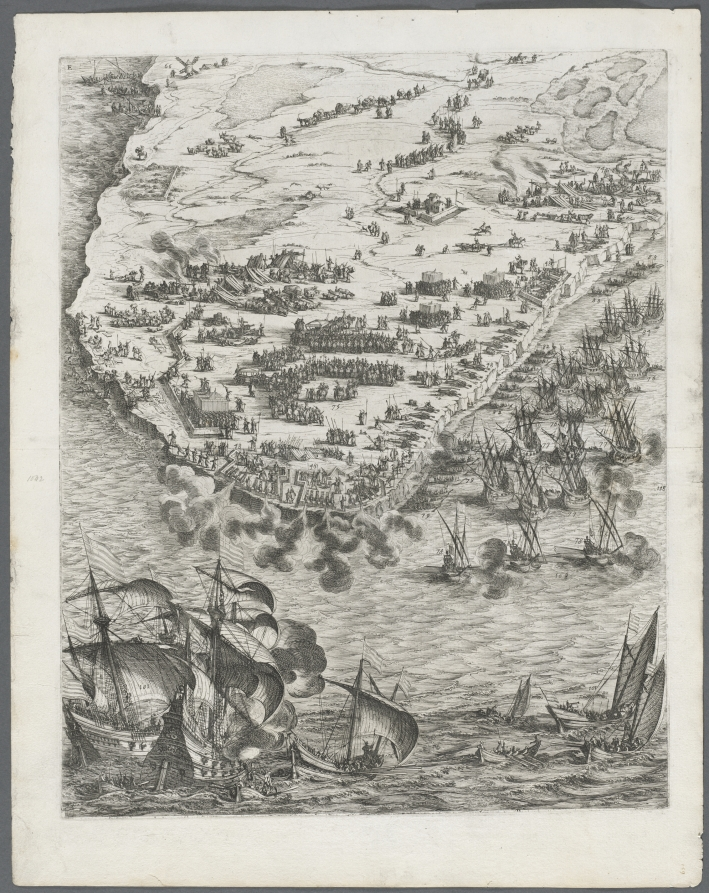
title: The Siege of La Rochelle: Plate 10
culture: France, 17th century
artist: Jacques Callot (French, 1592–1635)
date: 1628–1630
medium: etching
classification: Print